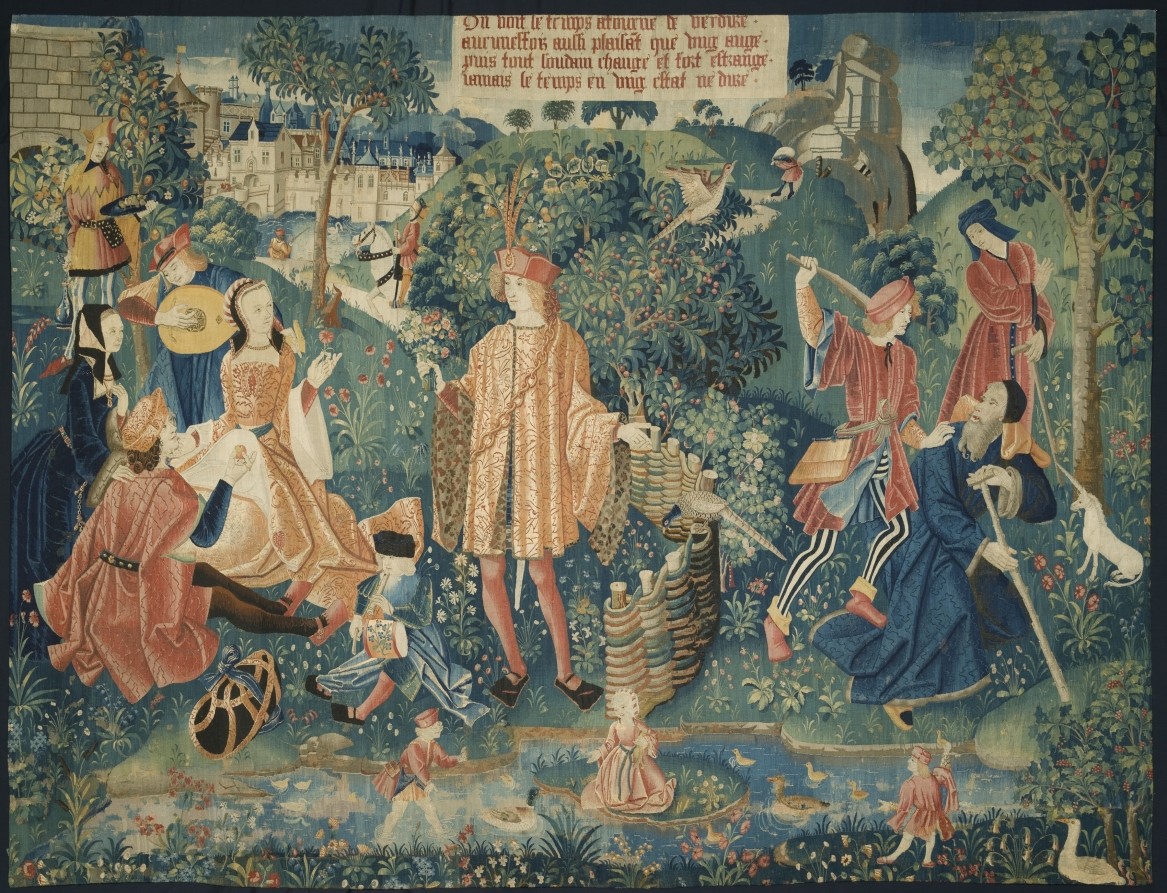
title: Time (from Chateau de Chaumont set)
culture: France, Lyon(?), early 16th century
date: 1512–15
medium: silk and wool; tapestry weave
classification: Tapestry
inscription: French verse in Gothic letters translates as follows: "One sees the weather adorned in green, Sometimes as pleasing as an angel; To suddenly change and be quite strange, The weather never stays the same."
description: Pierre Sala, who likely commissioned the set, is portrayed as the richly attired central figure offering a bouquet, a symbol of knowledge, to Éléonore, his daughter. Éléonore is pregnant, revealed by her upturned skirt and the persimmon in her husband Hector’s hand. Hector’s mother, Marguerite, in dark attire, will wed the widowed Sala in 1519. They appear in front of the royal chateau of Blois. The figures at the right convey Sala’s advice to his children. Time (the old man with the staff) with Clio, the Muse of History, standing on his shoulders, is being attacked by a Herculean youth wielding a stick. With this allegory, Sala is explaining that youth is ignorant of the complexities of life and time. The small unicorn at the far right represents the soul. The verse in Old French at the top refers to changing time: One sees Time adorned with green foliage, Sometimes as pleasant as an angel, Then suddenly change and become quite strange. Never does Time persist in one state.